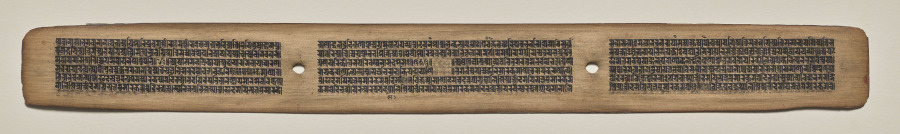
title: Text, Folio 81 (recto), from a Manuscript of the Perfection of Wisdom in Eight Thousand Lines (Ashtasahasrika Prajnaparamita-sutra)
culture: Eastern India, Bihar, Vikramashila Monastery. Painting: Nepal, Kathmandu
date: Sunday, September 14, 1119 (year 239 of the Newar Samvat in the month of Ashvina)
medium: gum tempera and ink on palm leaves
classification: Painting